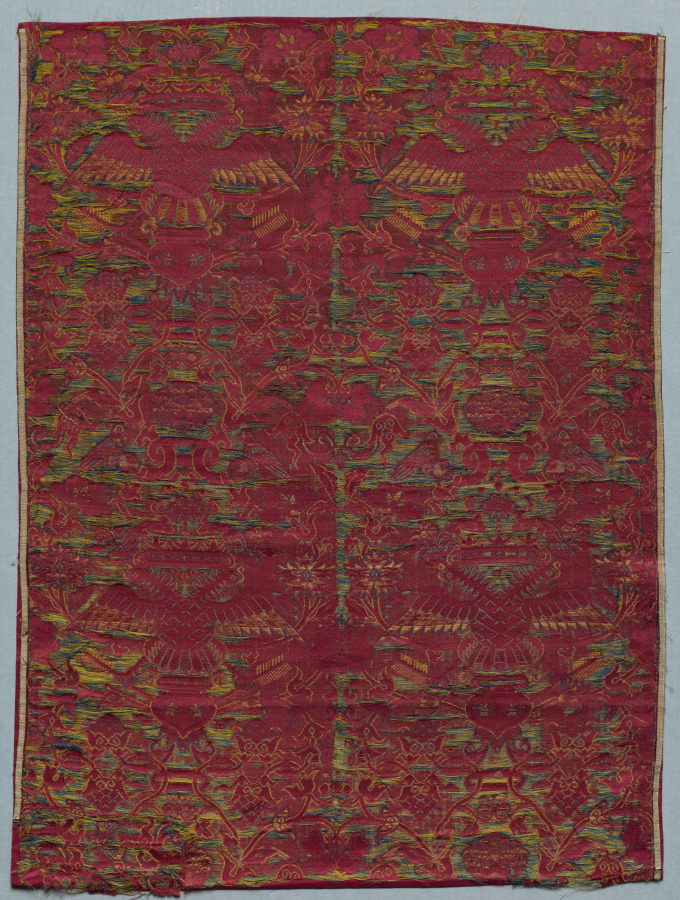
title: Strip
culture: Macao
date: c. 1550–99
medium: brocaded satin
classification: Textile